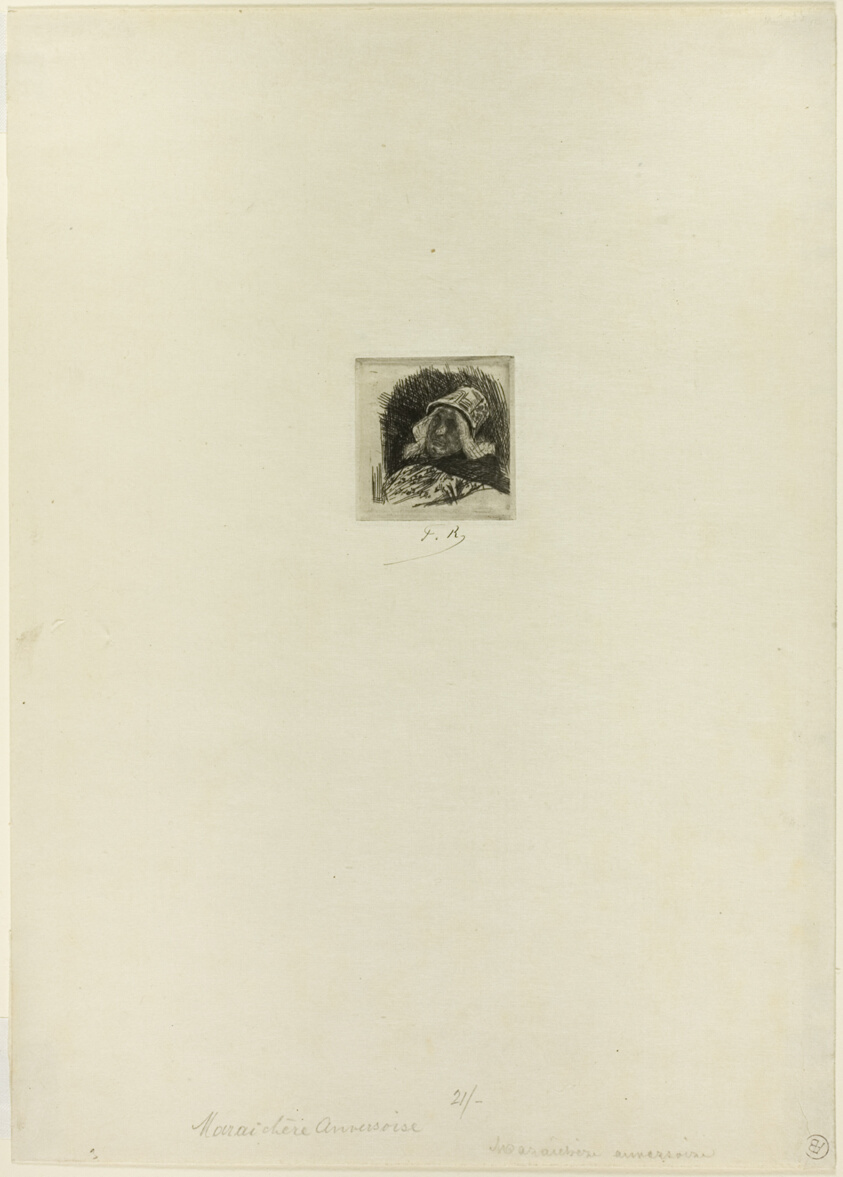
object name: Print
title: Flemish Market-Gardener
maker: Félicien Rops (Belgian, 1833-1898)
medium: Drypoint on ivory wove paper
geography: Belgium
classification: drypoint; print; prints and drawing